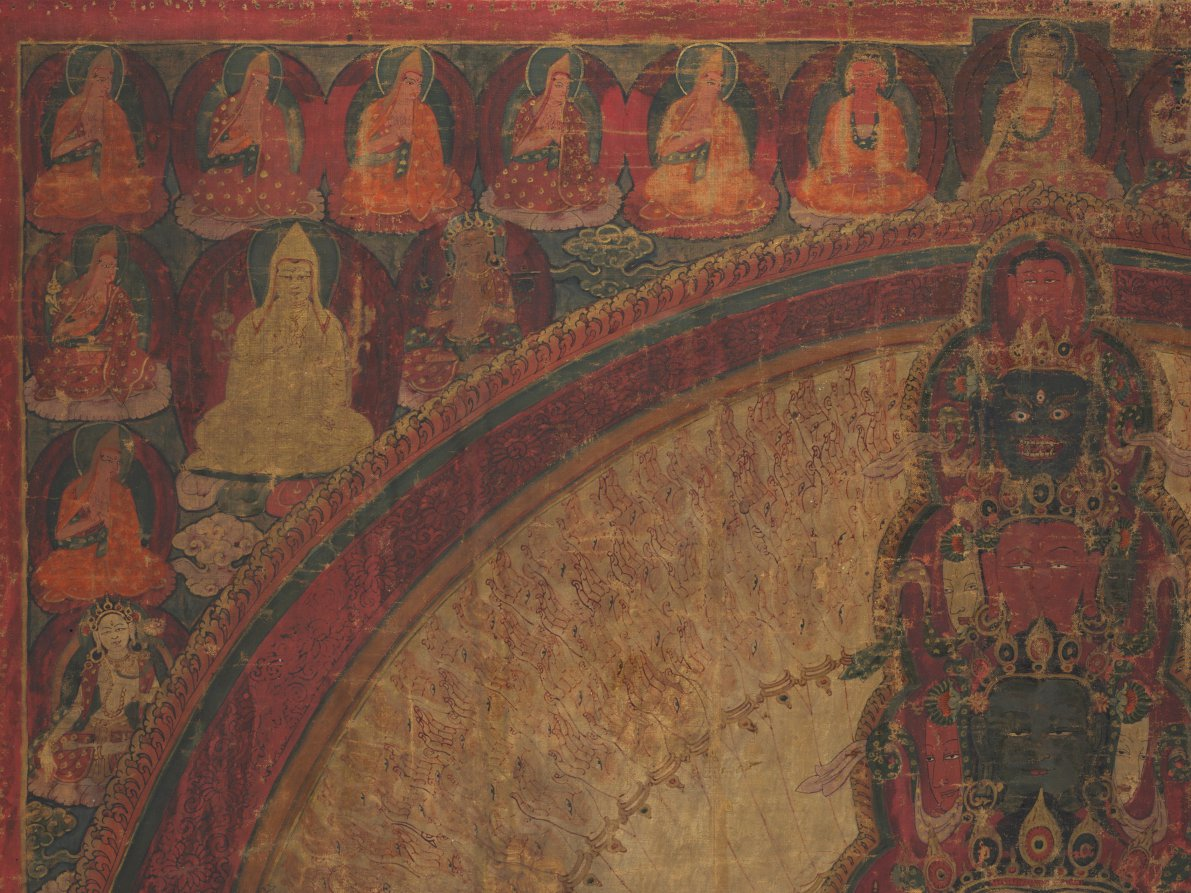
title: Eleven-Headed, Thousand-Armed Bodhisattva of Compassion (Avalokiteshvara)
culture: Western Tibet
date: c. 1500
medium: Gum tempera and ink on cotton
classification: Painting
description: One thousand arms surround the central figure like a radiating halo. Each hand has an eye in the palm to see the suffering of all beings, generating the sense of compassion that this figure embodies. The special form of the central image of the bodhisattva Avalokiteshvara derives from the mystic vision of a nun named Gelongma Palmo, who was born a Kashmiri princess, but prayed for leprosy to avoid having to marry and became an accomplished nun. While meditating in a cave, she achieved this vision of 11-headed, 1,000-armed Avalokiteshvara, who cured her leprosy and guided her on the path to enlightenment.